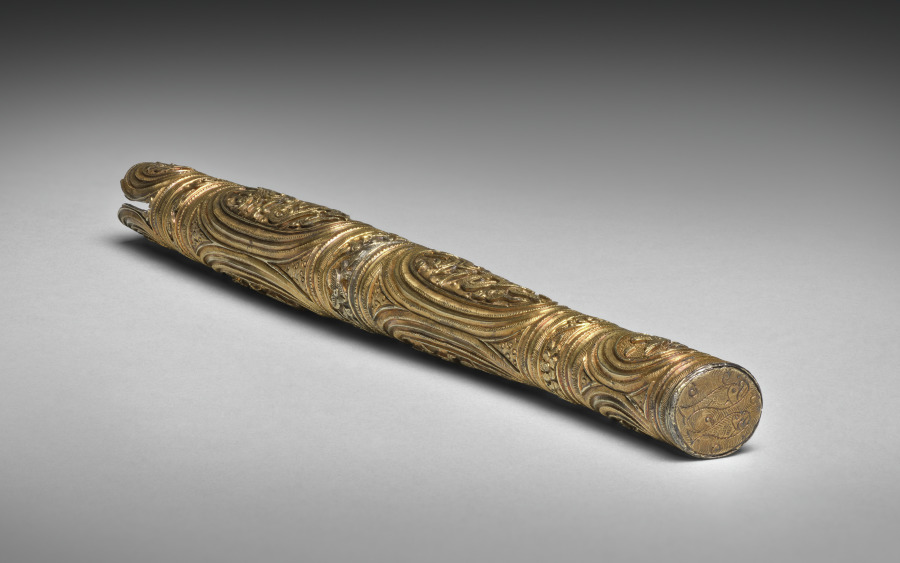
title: Knife Sheath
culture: Korea, Goryeo dynasty (918–1392)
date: 1100s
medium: Gilt silver (body) and brass (trefoil-shaped ring)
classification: Metalwork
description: Made by rolling a flat piece of silver plate, this knife sheath is decorated on each side with oval panels, including two larger middle panels showing an image of rising dragons with ring-punched scales. The circular upper panels bear the image of seated phoenixes. The flat bottom is engraved with a pair of fish, symbolizing harmonious unity. The trefoil-shaped ring attached to the tip of the sheath allows a string to connect it as a pendant to a belt. In medieval Korea, a miniature sheath such as this was considered an important fashion item, especially for elite members of the ruling class.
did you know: This 12th-century silver-gilt knife sheath is meant to be a pendent to a belt as a luxury ornament.